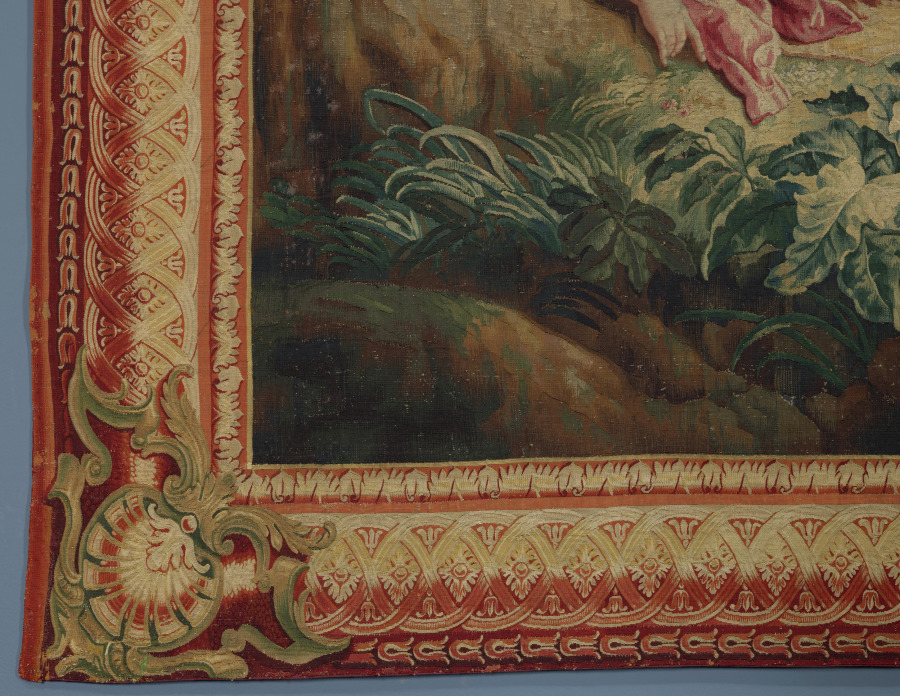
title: Diana's Return from the Chase (from Set of Ovid's Metamorphoses)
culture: France, 18th century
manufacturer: Gobelins Manufactory (France, Paris, est. 1662)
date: 1704–1731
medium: tapestry weave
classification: Tapestry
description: This tapestry’s elaborate border emulates a gilt picture frame, a key characteristic of eighteenth-century Gobelins tapestries. It portrays the goddess Diana at two distinct moments, during and following the hunt, the first accompanied by three dogs, and the second reclining among five attendants. The figures are positioned in a lush landscape near a small stream. A putto, poised to place an arrow in his bow, hovers above Diana. Goddess of the hunt and associated with wild animals and the moon, Diana can be identified by the crescent worn above her forehead. The dead hares indicate a successful hunt.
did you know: During the French Revolution, Gobelins tapestries were sometimes disassembled to harvest the gold threads.